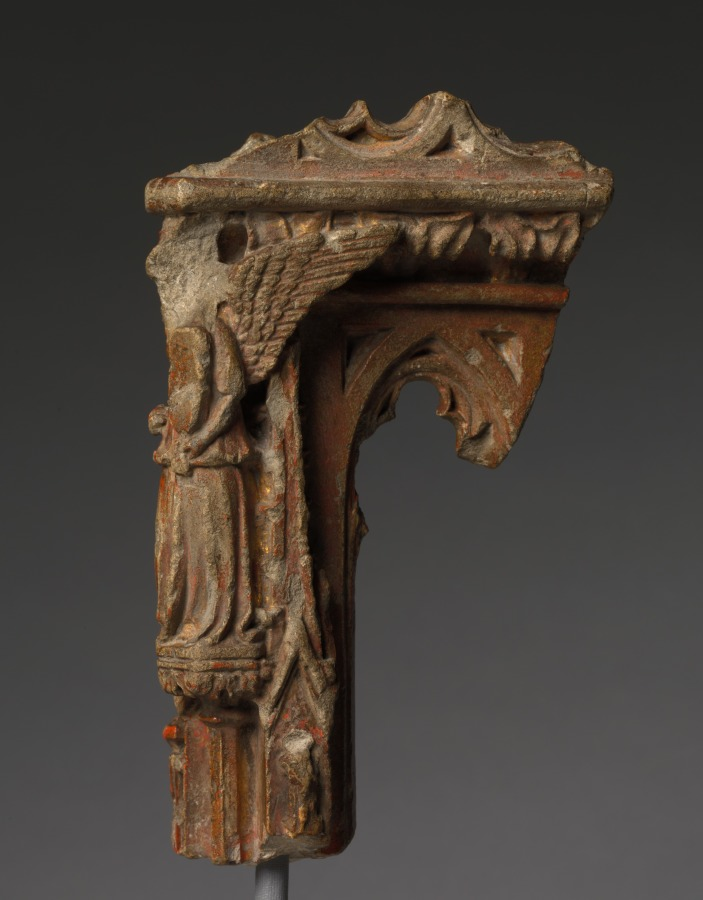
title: Fragment of an Architectural Canopy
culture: France, early 15th century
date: early 1400s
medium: limestone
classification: Sculpture